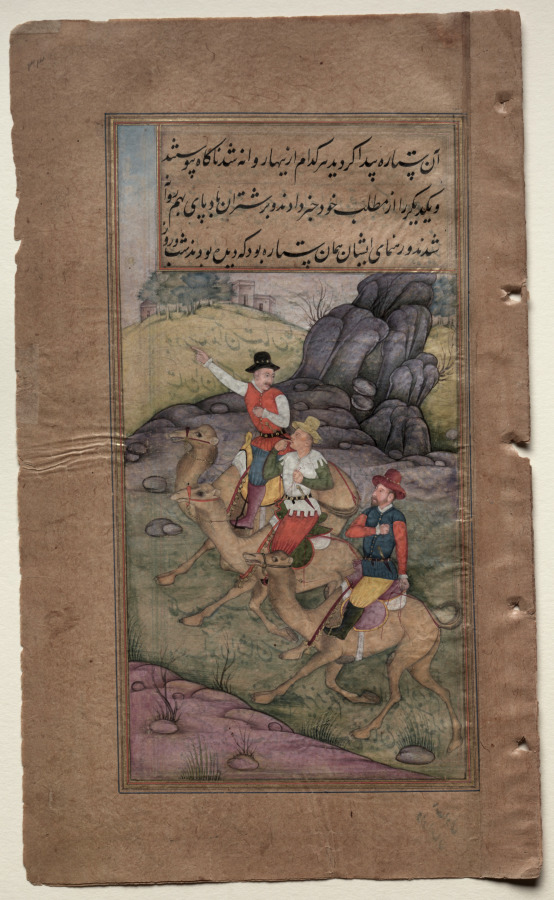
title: The Magi Follow the Star (folio 34 recto), from a Mirror of Holiness (Mir’at al-quds) of Father Jerome Xavier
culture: Mughal India, Allahabad, made for Prince Salim (1569–1627)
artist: attributed to Payag (Indian)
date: 1602–4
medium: Gum tempera, ink, and gold on paper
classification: Manuscript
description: One of the three kings points excitedly at the star at the upper left edge of the page, while another bites the finger of astonishment; the third holds his fist over his heart. They are all dressed like Portuguese merchants, but they ride camels associated with their homeland in Arabia, as specified in the text. The Westerners whom Mughals would have seen, besides priests, were mainly merchants from the Portuguese port of Goa on India’s western coast. They regularly visited Akbar to negotiate trade agreements, so they served as the primary visual model for all nonclerical Europeans. The artists who produced this manuscript worked for Akbar before joining Prince Salim at his rebel court in Allahabad.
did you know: At the breakaway court of Prince Salim in Allahabad, high-quality materials were not as plentiful as in the imperial capital. The paper is brittle and has browned excessively, and the paint films are relatively thin; here the text from the verso shows through the lightly colored background.